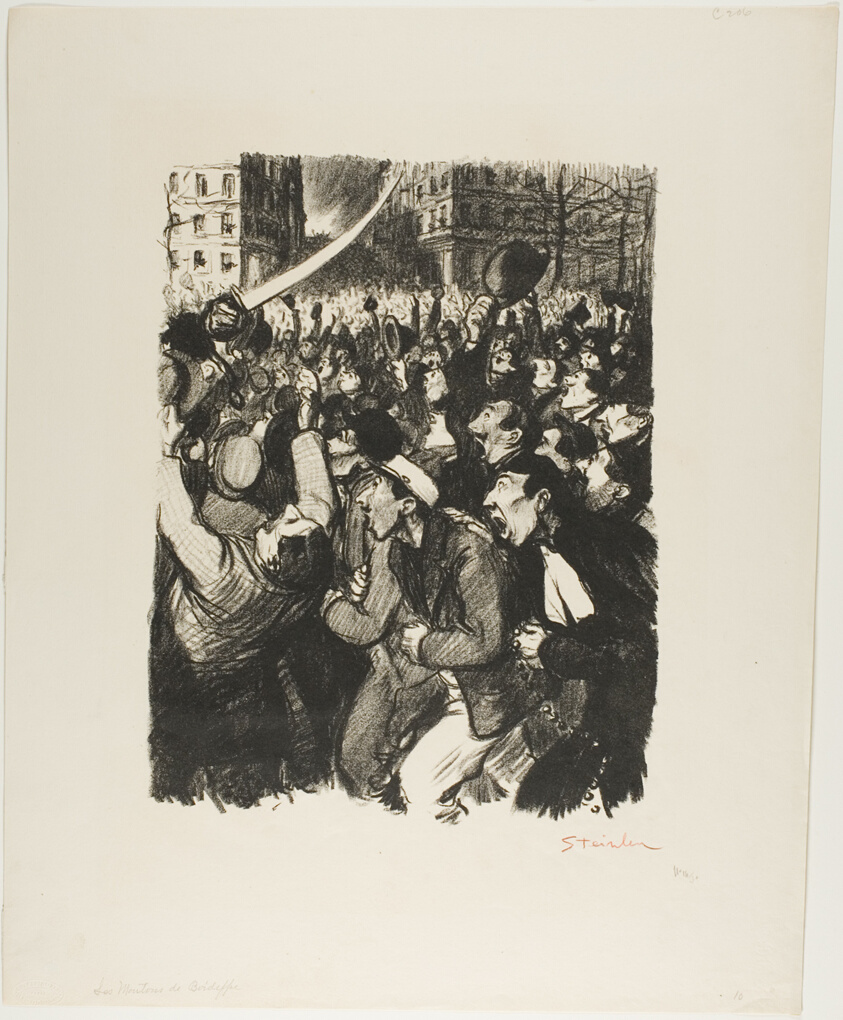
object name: Print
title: The Sheep of Boisdeffre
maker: Théophile-Alexandre Steinlen; French, born Switzerland, 1859-1923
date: February 1898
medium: Lithograph in black on ivory wove paper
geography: France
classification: lithograph; print; prints and drawing